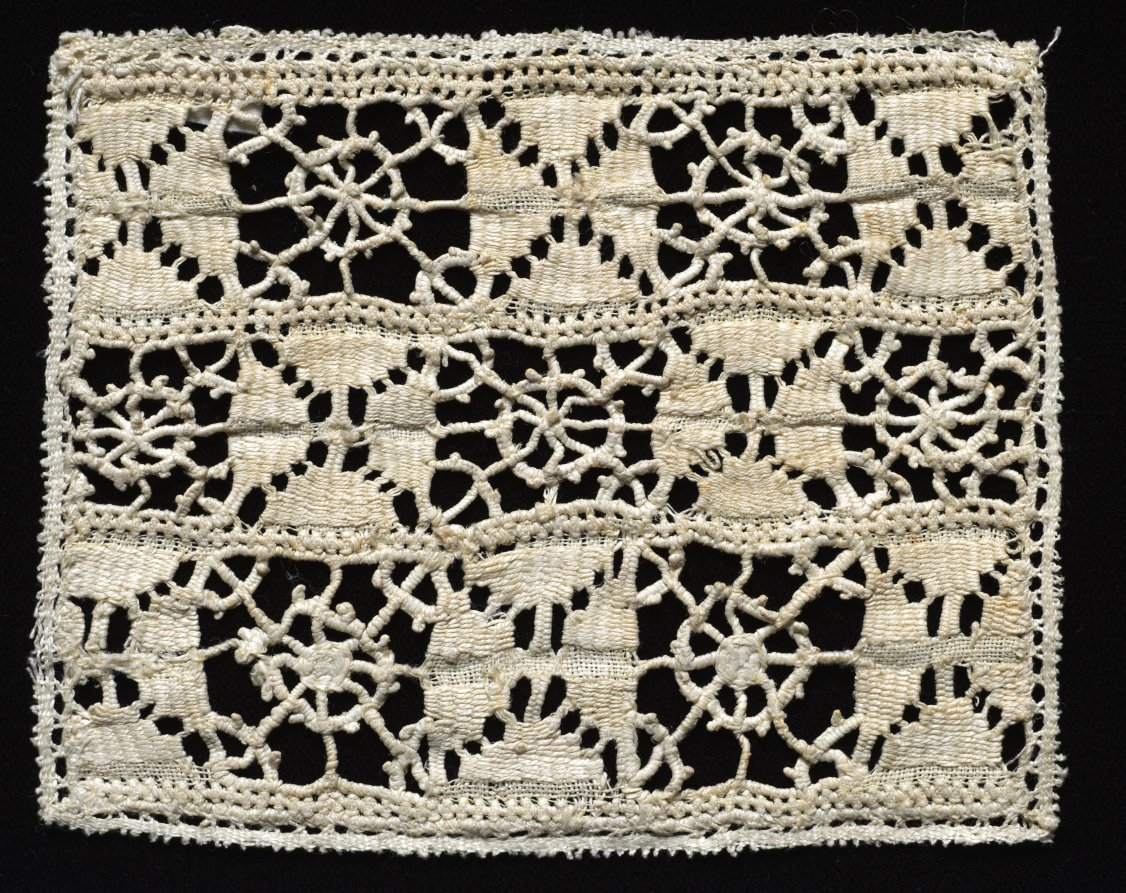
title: Lace fragment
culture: Italy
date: 1500s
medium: Linen: needle lace (reticella and drawnwork)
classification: Lace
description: This fragment contains alternating squares of drawnwork and reticella in a plain weave linen ground.